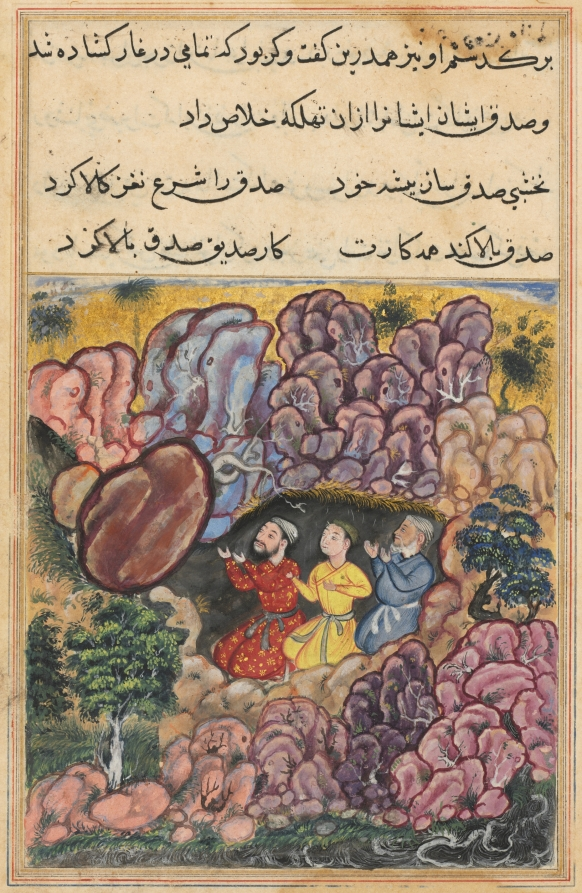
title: The tale of the three men trapped in a cave by a rolling boulder, from a Tuti-nama (Tales of a Parrot): Thirty-second Night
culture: Mughal India, court of Akbar (reigned 1556–1605)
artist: attributed to Bihzad (Persian, active in India mid-1500s)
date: c. 1560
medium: gum tempera, ink, and gold on paper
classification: Painting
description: Three men kneel in the bowels of a dark cave where they have been trapped while seeking hidden treasure. Fearful and desperate, they suddenly hear a disembodied voice that orders them to confess their transgressions. As each man speaks, a portion of the boulder disappears, and they are ultimately freed.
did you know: This painting is attributed to Bihzad, the son of Abd al-Samad the Persian master of the Mughal court.